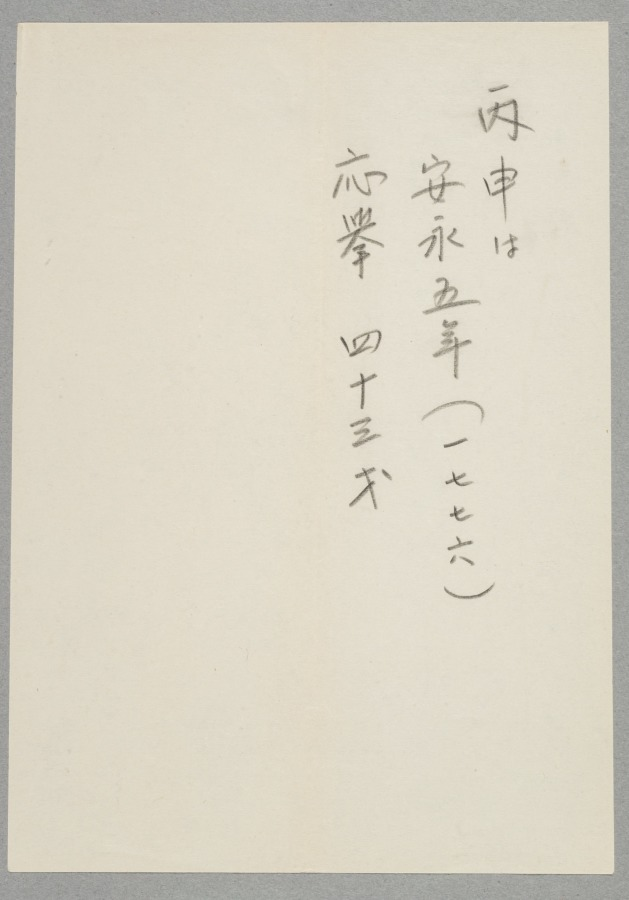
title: Tiger in Wind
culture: Japan, Edo period (1615–1868) to Meiji period (1868–1912)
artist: after Maruyama Ōkyo (Japanese, 1733–1795)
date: 1800s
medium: hanging scroll; ink on paper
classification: Painting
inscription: 「秋空一鶴」賛 長嘯一聲風括地「月渚」朱文方印「祐常之章」白文方印 壬辰初冬寫応挙 「應舉之印」白文方印・「仲選」白文方印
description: The seals appended to the inscription on this painting suggest that the text was brushed by Yūjō (1723–1773), an imperial prince who became a Buddhist monk and was abbot of Enman'in at Miidera. The line is from a poem attributed to a Yuan dynasty poet, Yu Ruyu (dates unknown), and describes the sound of a fierce wind lashing the ground. Wind is associated with the roar of the tiger. Yūjō was Maruyama Ōkyo's most important patron as a young artist, and this painting has a signature asserting that Ōkyo created it in 1772, the year before Yūjō's death. While Yūjō produced a preface for a now famous set of handscrolls he commissioned Ōkyo to paint, and a number of Ōkyo's compositions for Enman'in survive, this work would appear to be one imagining their relationship, as opposed to a genuine piece.